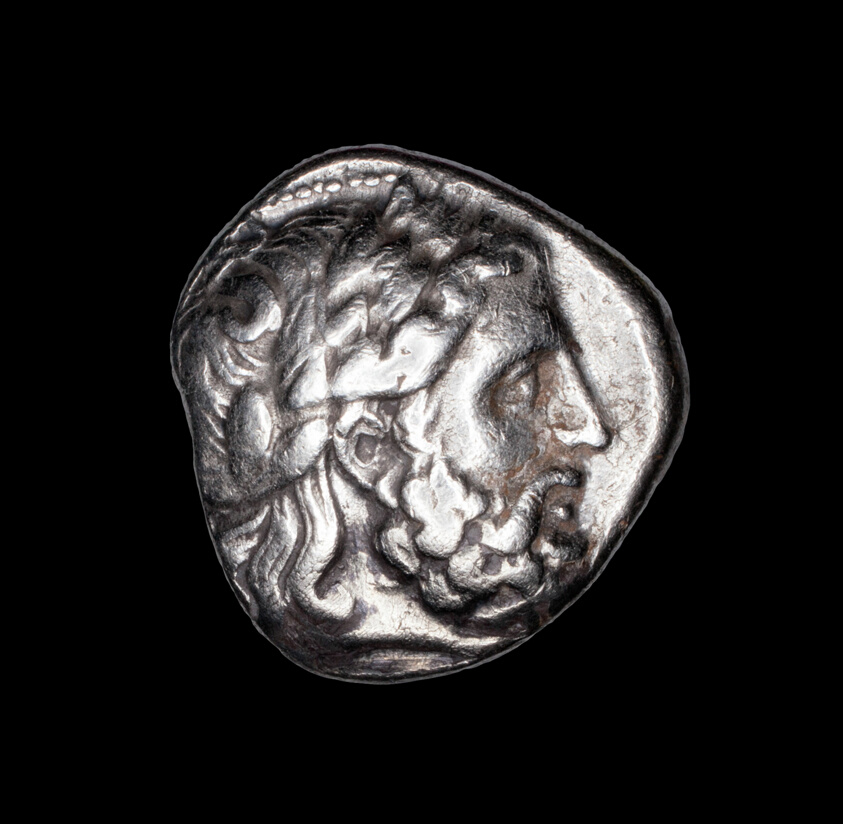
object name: Coin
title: Tetradrachm (Coin) Depicting the God Zeus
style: hellenistic, ancient, greek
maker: Greek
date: 359-336 BCE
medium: Silver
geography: Macedonia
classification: coin; ancient art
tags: zeus, mythological figures